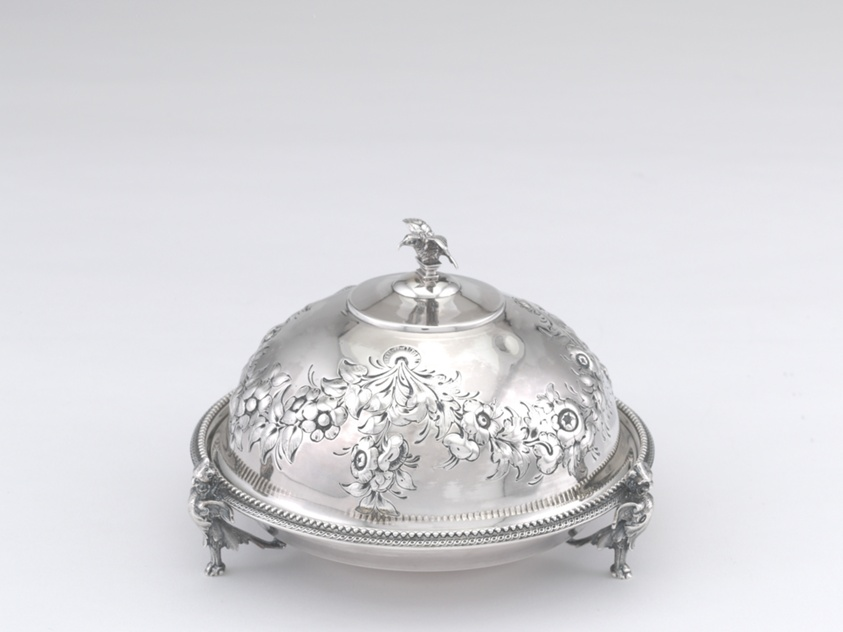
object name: Metalwork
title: Butter Dish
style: 19th century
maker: Gorham Manufacturing Company (American, founded 1831); Providence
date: 1853–65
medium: Silver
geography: Providence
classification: vessel for serving food; dish (vessel); silver; american decorative arts; american arts; decorative arts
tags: butter dish, birds, flowers, eagles, dining, eating